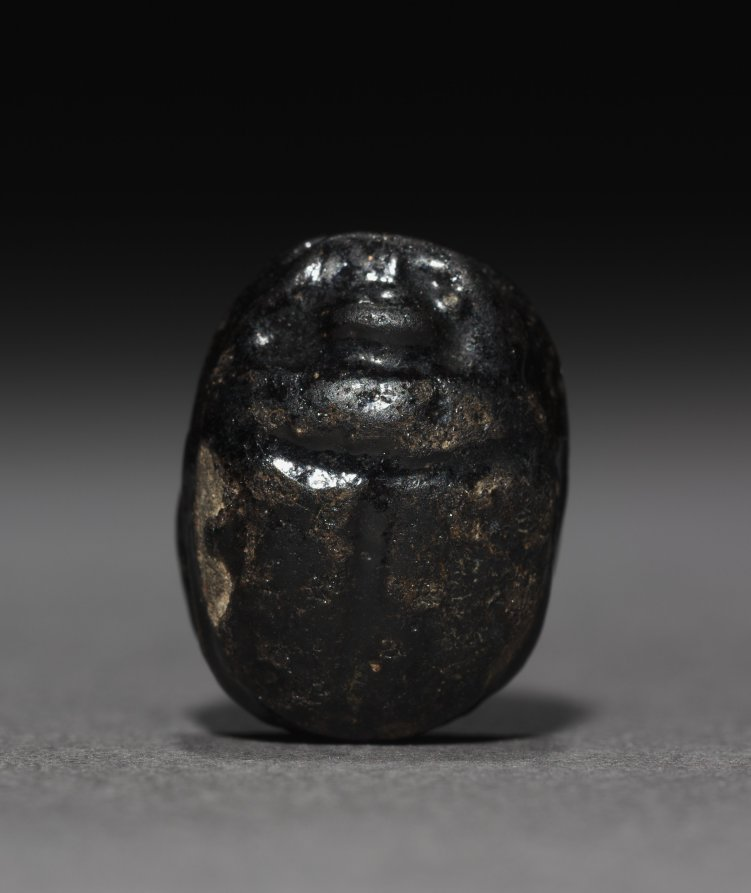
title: Scarab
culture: Egypt, Modern forgery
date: 1900–1914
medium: glazed ceramic (?)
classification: Scarabs